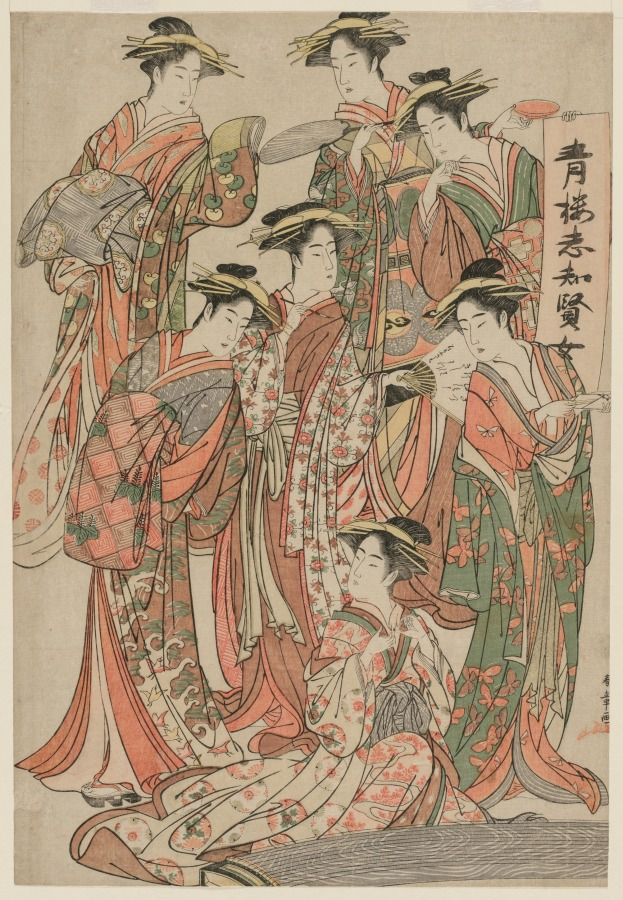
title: Seven Wise Women of the Pleasure Quarters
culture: Japan, Edo period (1615–1868)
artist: Katsukawa Shunshō (Japanese, 1726–1792)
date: c. mid 1780s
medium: color woodblock print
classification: Print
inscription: Signature: Shunsho ga Artist Seal: kakihan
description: The courtesan standing at the center of this print holds a writing brush. She is identified by the fan in her left hand, which has a poem signed Hanaōgi, or Flower-Fan.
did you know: This print is a play on the Chinese theme of the Seven Sages of the Bamboo Grove.